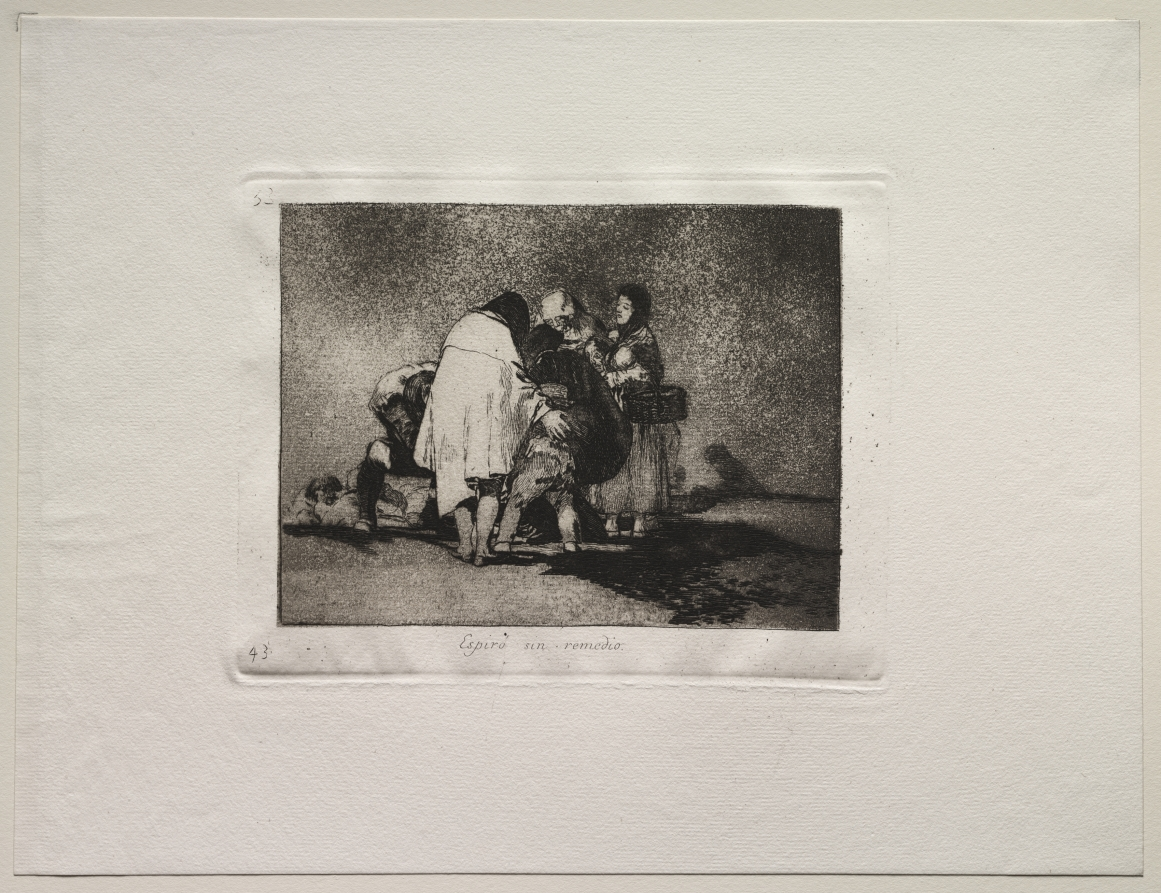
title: The Horrors of War: There Was Nothing to be Done and He Died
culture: Spain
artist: Francisco de Goya (Spanish, 1746–1828)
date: c. 1810–20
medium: etching and aquatint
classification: Print